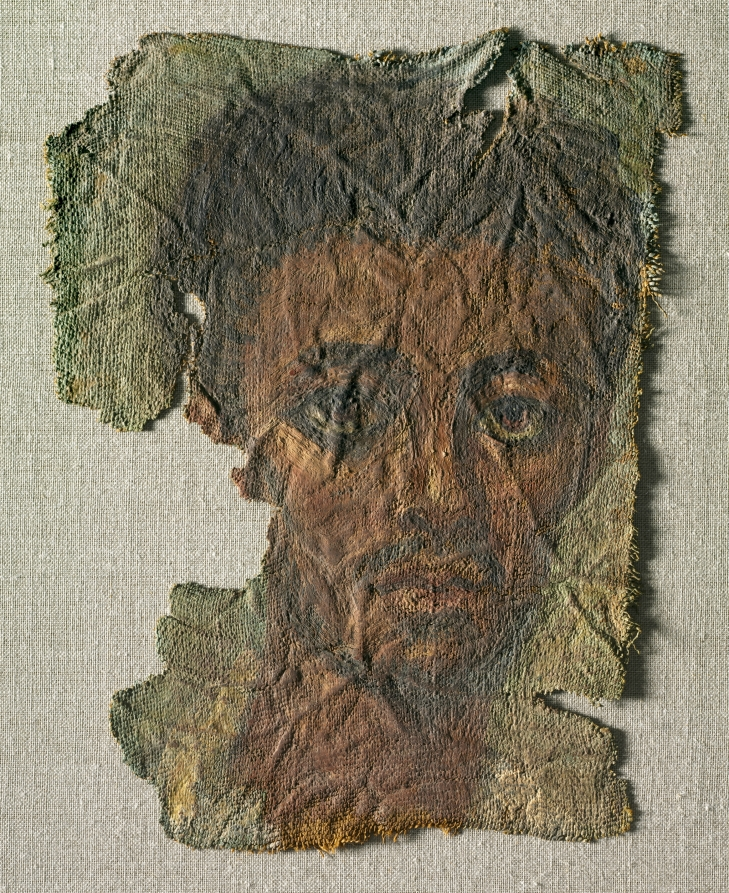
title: Funerary Panel of a Man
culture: Antonine-era Roman Empire (Egypt), unknown painter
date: about 138–92 CE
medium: encaustic on linen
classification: Painting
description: A young man with a slight mustache and warm brown eyes looks at the viewer from this painting. The linen on which his image was rendered was a less popular alternative to wood. Its delicate surface was only workable with brushes, and not the flat metal tools used for details on wooden paintings. The rest of the cartonnage (body case) the man’s image was once part of was painted with ancient Egyptian religious imagery, like that of the young man Artemidorus. The blended decorative forms on the cartonnage show how distinctive Greco-Roman and Egyptian representational systems interacted in Roman-ruled Egypt.